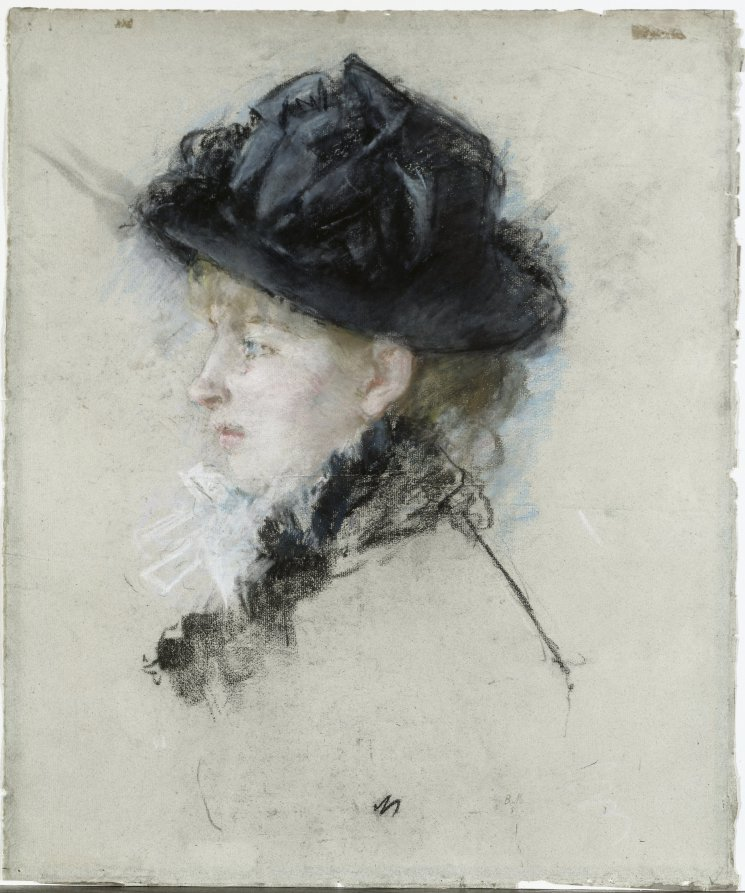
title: Mademoiselle Louise Riesener in a Hat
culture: France, 19th century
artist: Berthe Morisot (French, 1841–1895)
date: c. 1877–80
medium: pastel on pale blue laid paper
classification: Drawing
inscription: stamped, bottom right, in ink (faded): collection of Berthe Morisot [L.388a]; watermark, at top center: illegible cartouche; and at bottom center: PL BAS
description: This portrait depicts Louise Riesener, daughter of artist Léon Riesener and close friend of Morisot. The artist depicted her subject in bust-length profile wearing a black jacket out of which peek the decorative ties of a white blouse. Morisot paid particular attention to the hat; a fashionable Parisian woman of the upper-middle class would have worn such an accessory whenever she went out in public. Morisot produced nearly 200 pastels during her career, the majority figure studies and portraits brought to varying degrees of finish.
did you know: Morisot favored the (formerly) blue paper used here for pastels and used it for numerous works.